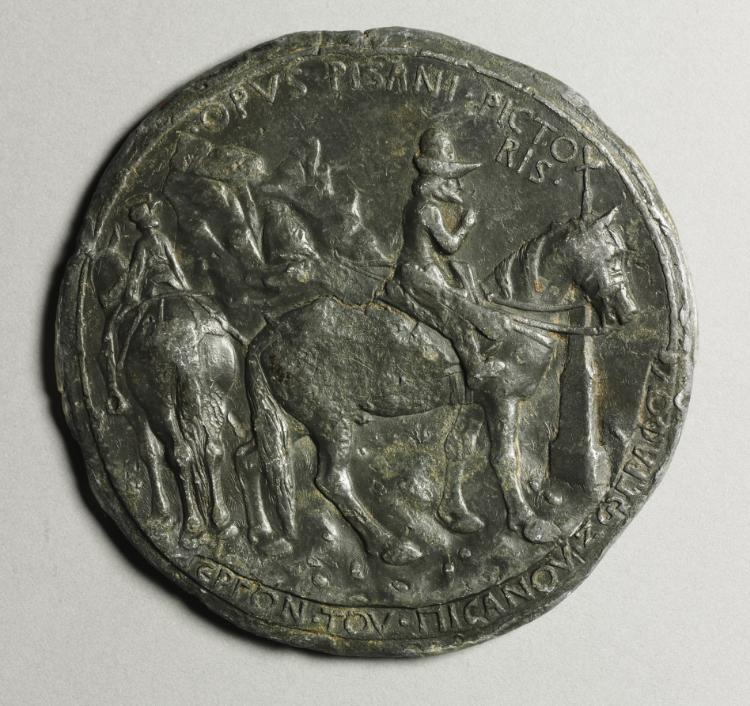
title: Portrait of John VIII Palaoelogus, Emperor of Constantinople, 1424-1428 (reverse)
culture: Italy, 15th century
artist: Pisanello (Italian, Ferrara, c. 1395–1455)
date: c. 1438–1439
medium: lead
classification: Sculpture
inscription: reverse: OPVS PISANI PICTORIS, EP ON TOV ICANOV ZW PA OV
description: The art of the medal was introduced into Italy by Pisanello, His work as a medalist began with the portrait medal of this emperor, who, in 1438, visited the Council of Ferrara.